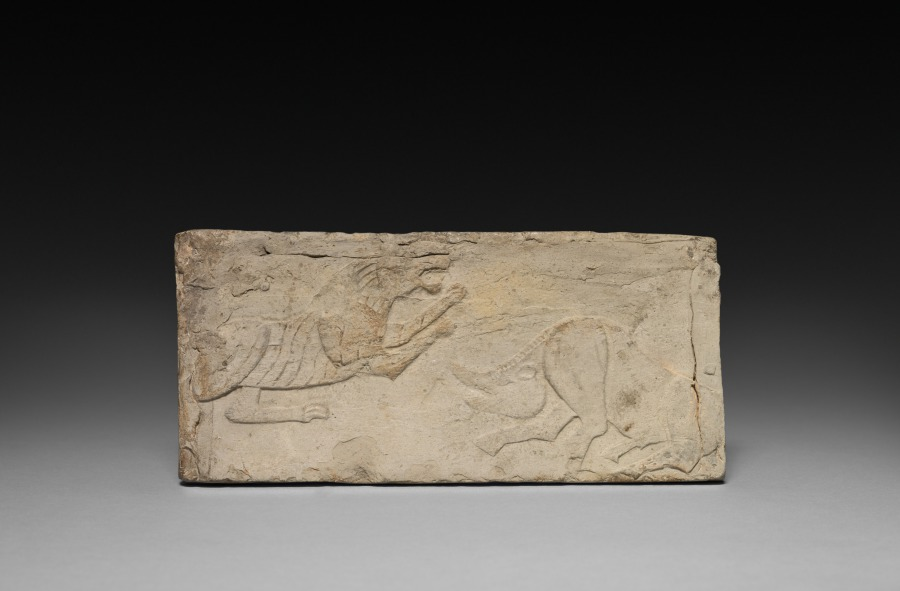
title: Relief with Rampant Tiger and Boar from a Funerary Stove Model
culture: China, from a tomb in Xi'an, Shaanxi province, Han dynasty (202 BCE–220 CE)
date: 202 BCE–220 CE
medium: earthenware with relief decoration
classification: Ceramic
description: This pottery panel and 1925.140 were made in molds to be joined with other panels to build a miniature stove. The panels, however, are not complete and presumably do not belong together. This panel depicts a tiger attacking a boar.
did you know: Han dynasty tombs were often furnished with grave goods to provide the deceased with items for the afterlife.